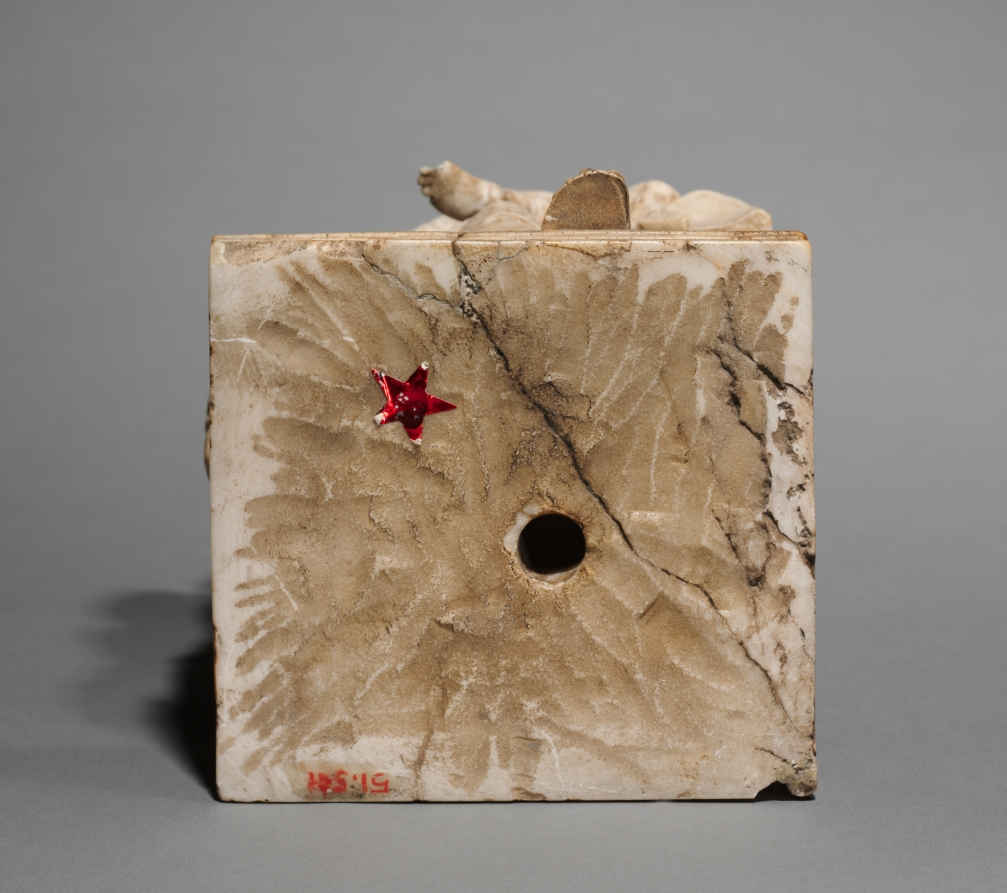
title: Charity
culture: Franco-Flemish, second half 16th century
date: c. 1550–1600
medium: alabaster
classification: Sculpture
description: When this alabaster group entered the museum's collection, it was thought to depict the Virgin Mary, Christ, and Saint John the Baptist. It has been identified, however, as a personification of Charity, the most elevated of the three Christian theological virtues. The two other theological virtues are Faith and Hope. Within Christian belief, Charity is also known as a supernatural virtue, where the object of human conduct is the ultimate unification with God through love. Alluding to its eminent position, Charity sits enthroned, with powerful hybrid beasts supporting her chair. The diminutive footstool propping up her left foot may refer to the necessity of humility in one's relationship to God. Also, a child raises a vessel filled with fruits to another suggesting that selflessness and love are attributes of charitable actions.